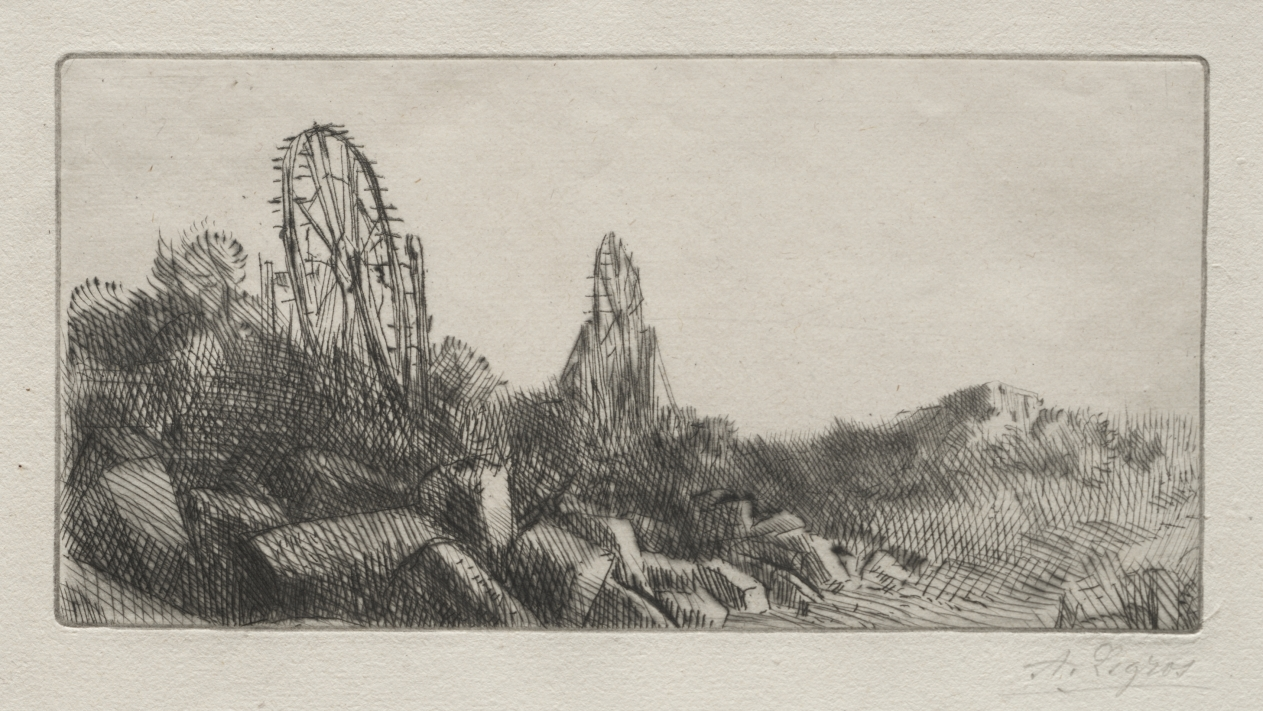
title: The Old Stone Quarries of Montrouge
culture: France, 19th century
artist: Alphonse Legros (French, 1837–1911)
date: c. 1857–1911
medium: drypoint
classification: Print